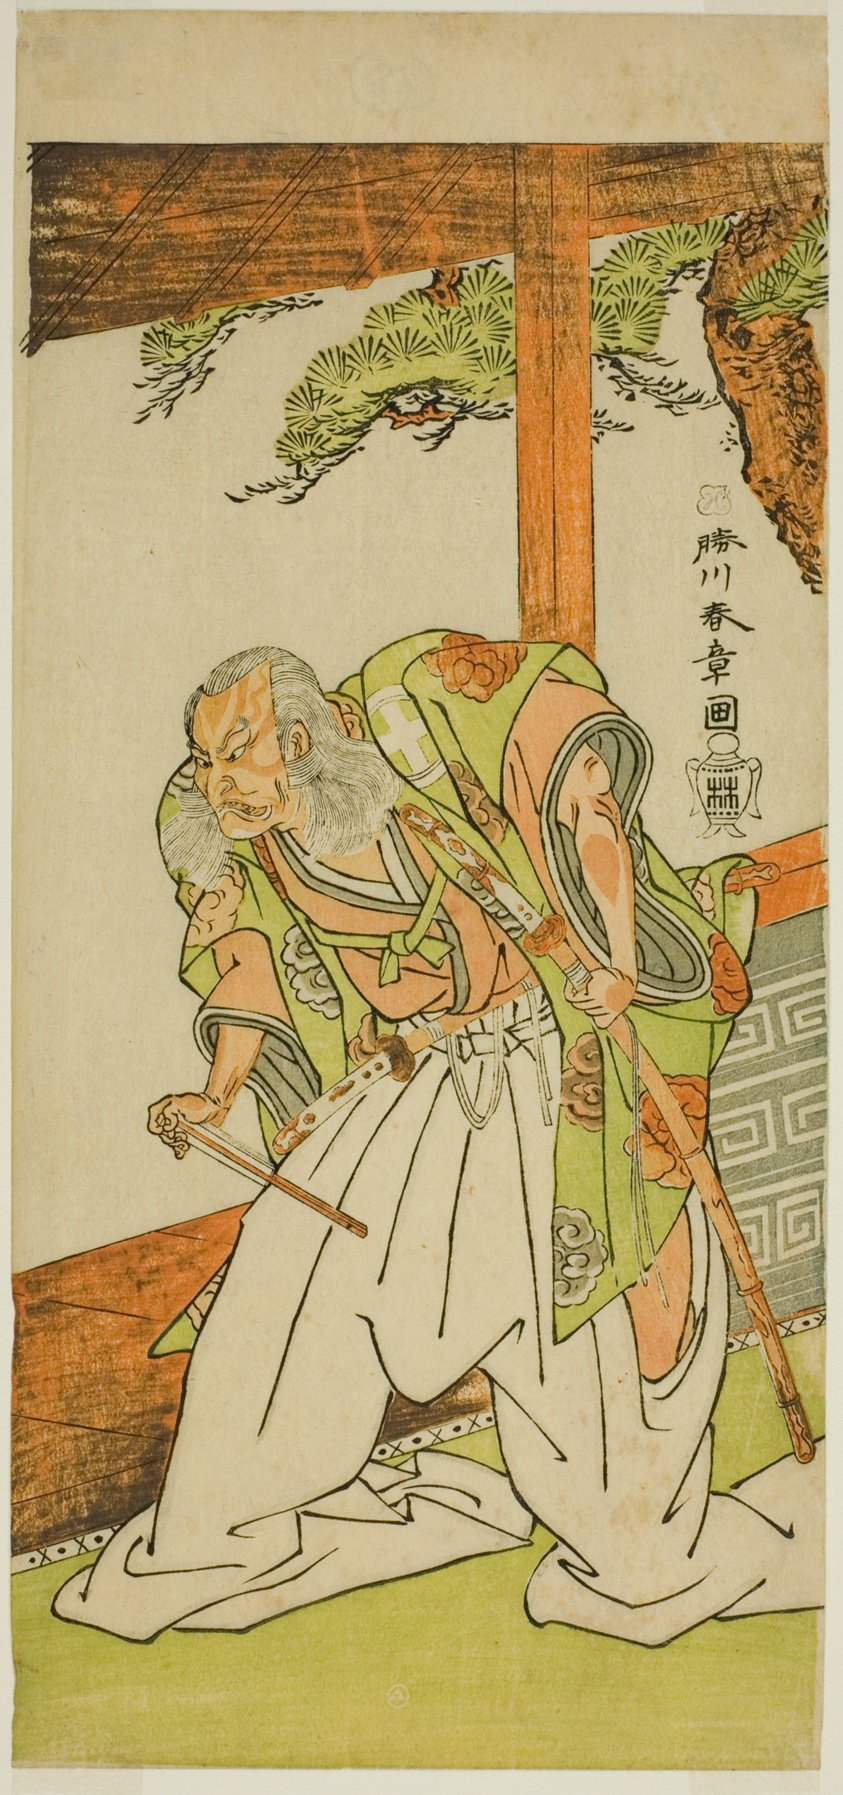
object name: Print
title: The Actor Otani Hiroemon III as Shinoda Jirodayu in the Play Keisei Momiji no Uchikake, Performed at the Morita Theater in the Seventh Month, 1772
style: Japanese (culture or style)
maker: Katsukawa Shunsho 勝川 春章; Japanese, 1726-1792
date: c. 1772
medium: Color woodblock print; hosoban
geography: Japan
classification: woodblock print; print; asian art